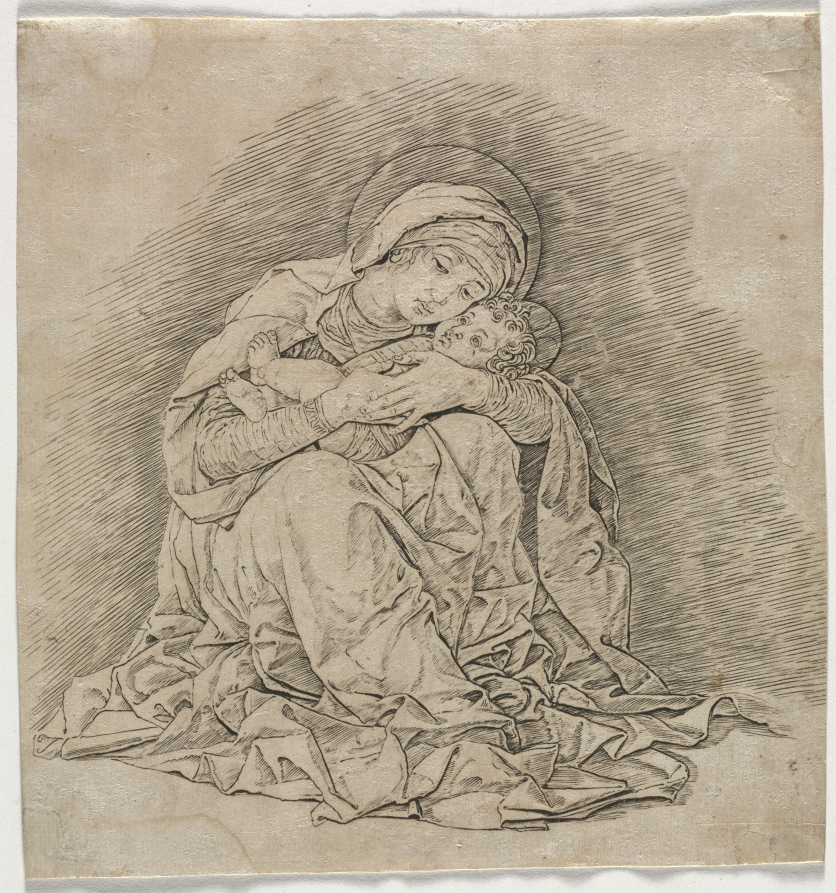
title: Virgin and Child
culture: Italy, 15th century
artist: Andrea Mantegna (Italian, about 1431–1506)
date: 1485–1491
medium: engraving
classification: Print